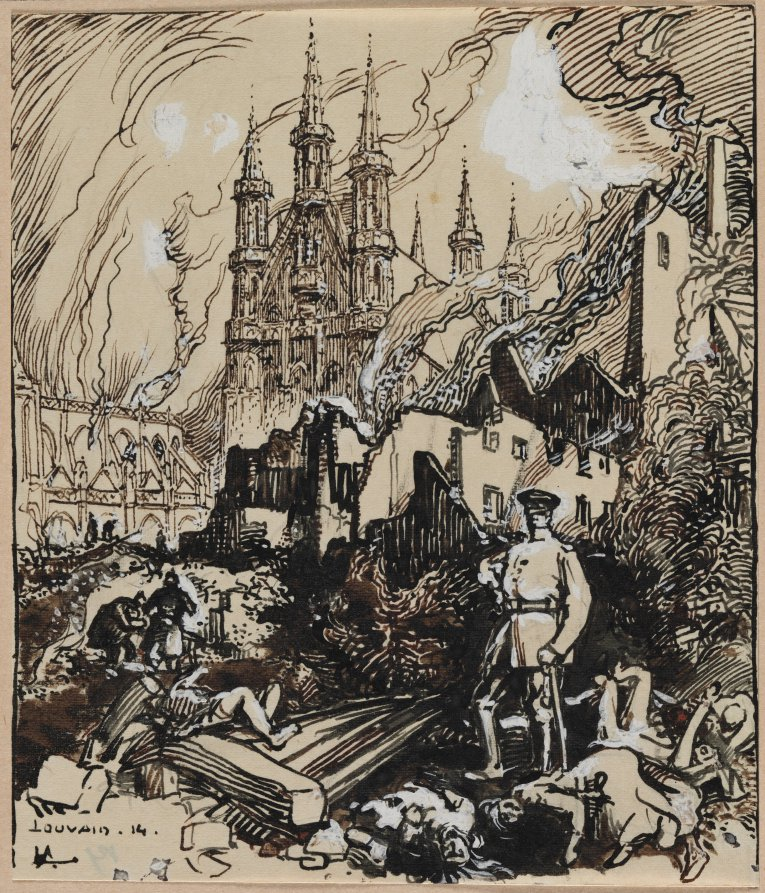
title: Louvain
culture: France, 20th century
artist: Auguste Louis Lepère (French, 1849–1918)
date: 1914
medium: brush and brown ink with touches of black ink with white corrections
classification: Drawing